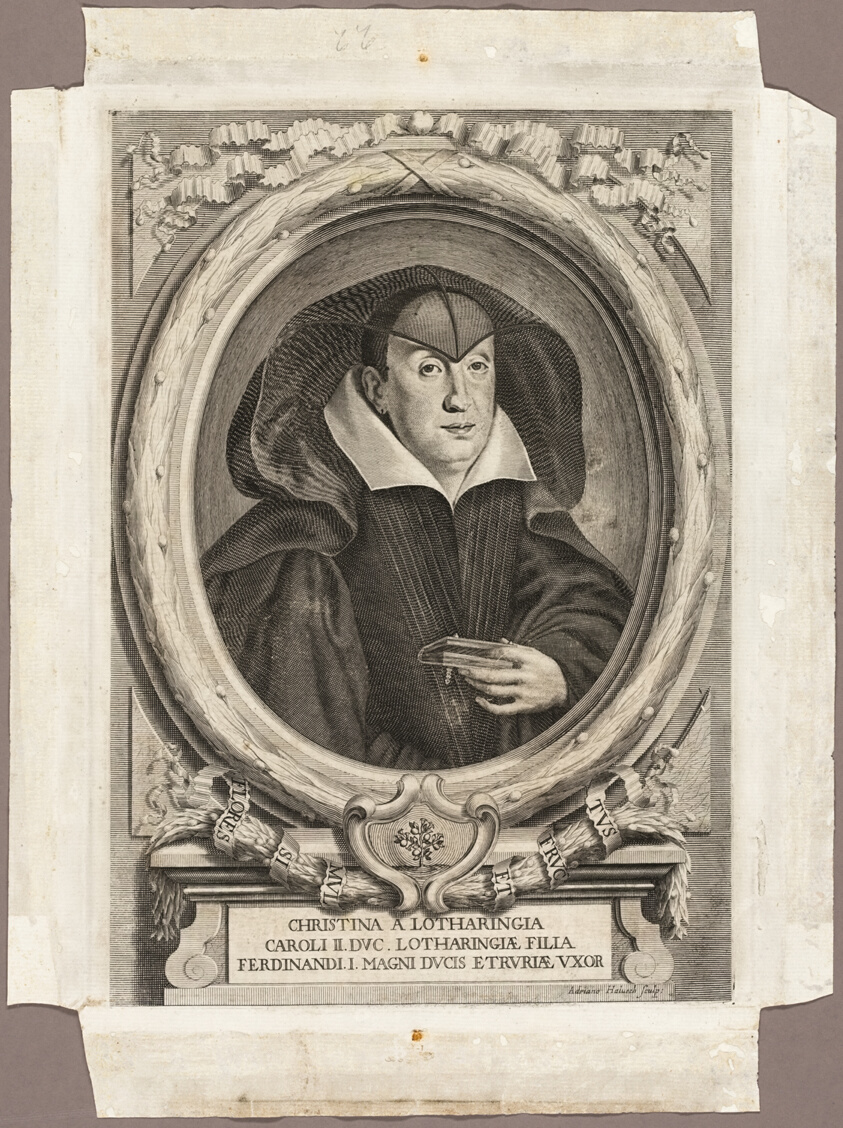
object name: Print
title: Christina of Lorraine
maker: Adriaen Haelwegh (Dutch, born 1637); published by Giuseppe Allegrini, Florence, 1761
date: 1666; published 1761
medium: Engraving on ivory laid paper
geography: Netherlands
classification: engraving; paper; print; prints and drawing